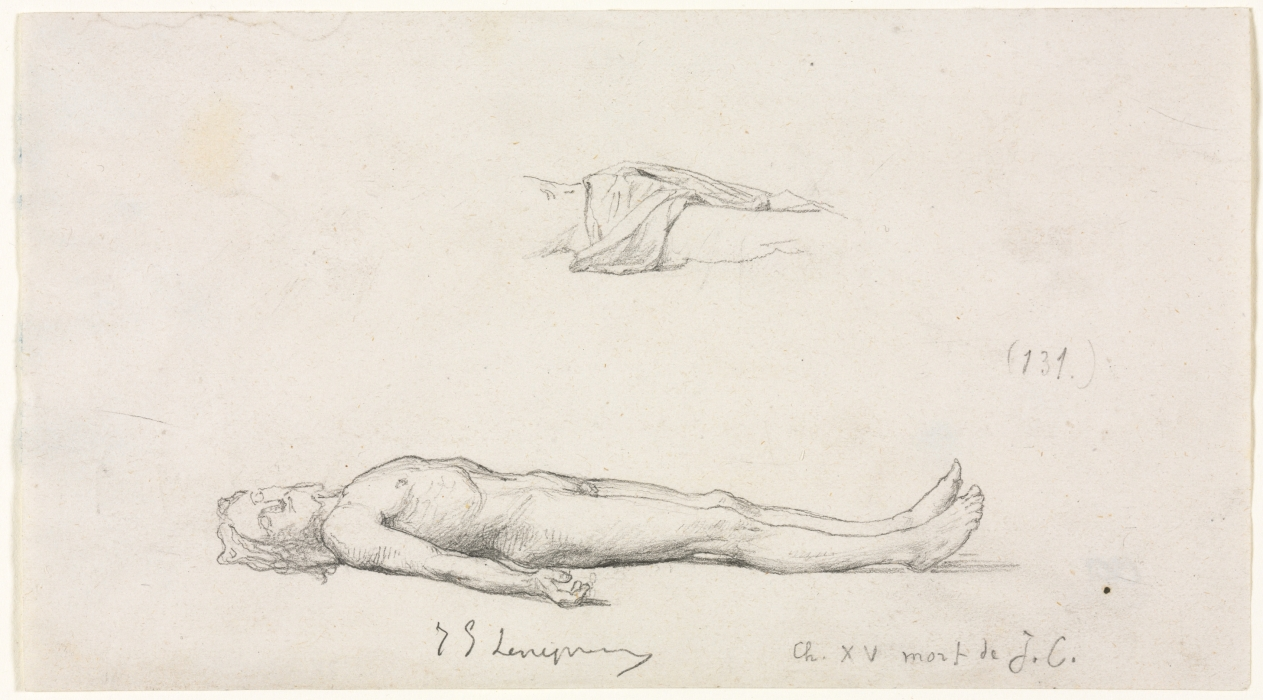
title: Sketch of the Dead Christ, and Detail Sketch of Loincloth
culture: France, 19th century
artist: Jules Eugène Lenepveu (French, 1819–1898)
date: 1800s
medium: graphite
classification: Drawing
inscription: signed, lower center, in graphite: J E Lenepveu ; center left, in graphite: (131.) ; [by artist?], lower right, in graphite: Ch. XV mort du J.C.